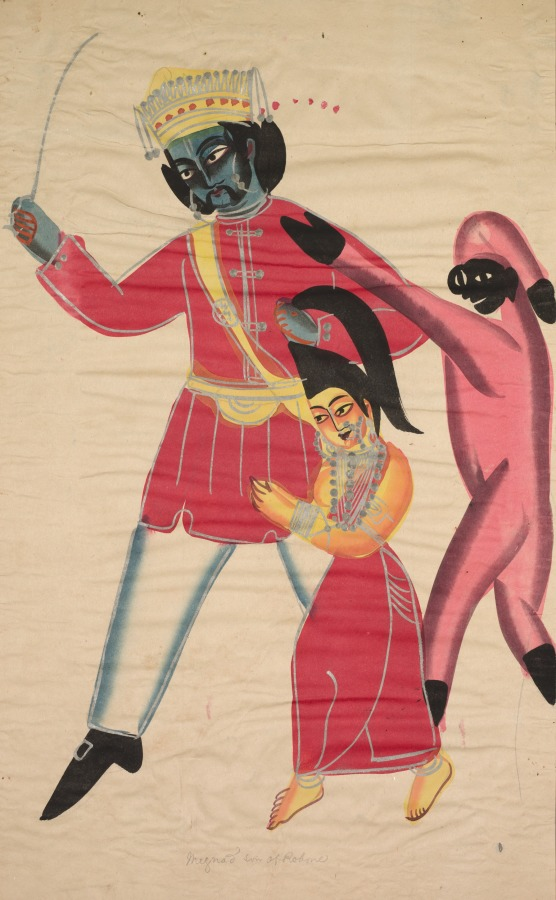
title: Megha-Nada (Indrajit, Son of Radha)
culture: Eastern India, Bengal, Kolkata, Kalighat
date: c. 1890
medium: Gum tempera, graphite, ink, and tin on paper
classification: Painting